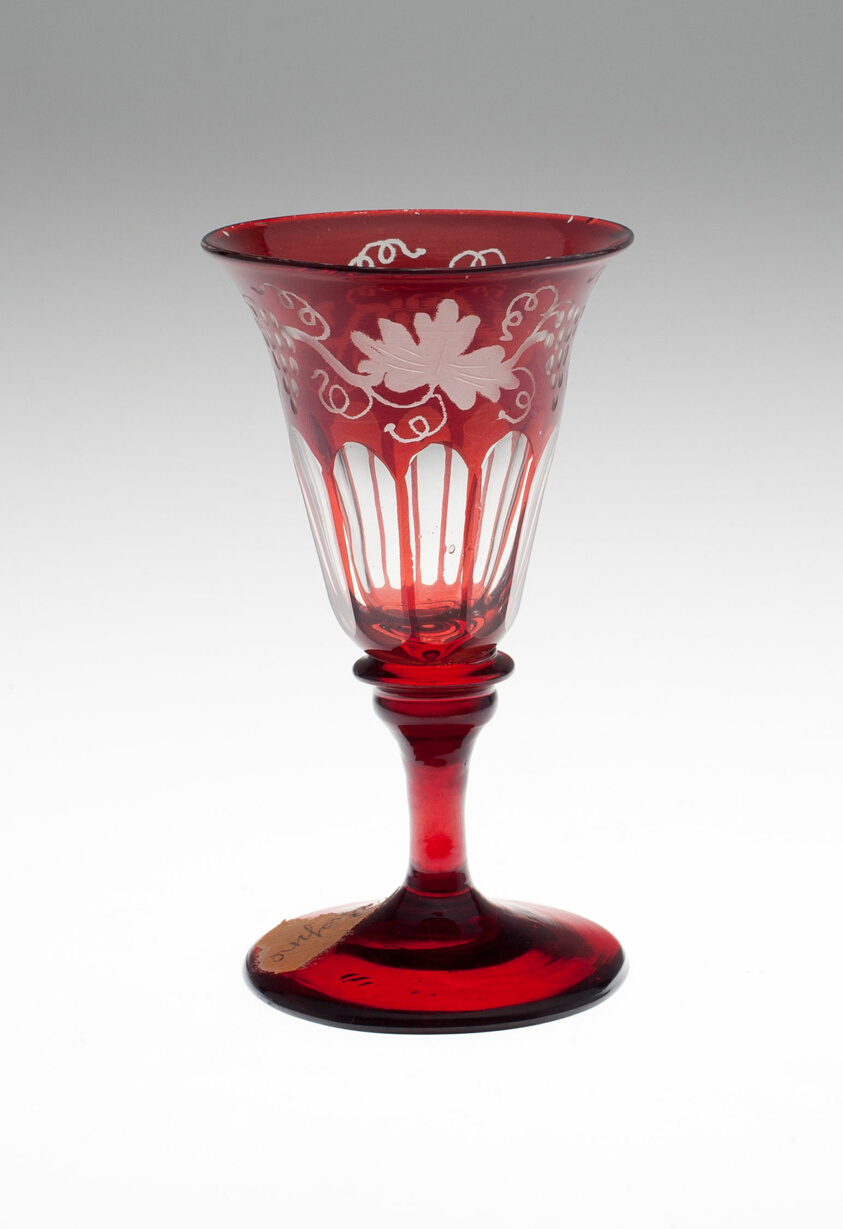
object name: Glass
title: Wine Glass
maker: Bohemia, Czech Republic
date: Mid to late 19th century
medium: Glass; blown, cut, stained red adn engraved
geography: Bohemia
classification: drinking vessel; glass; european decorative arts